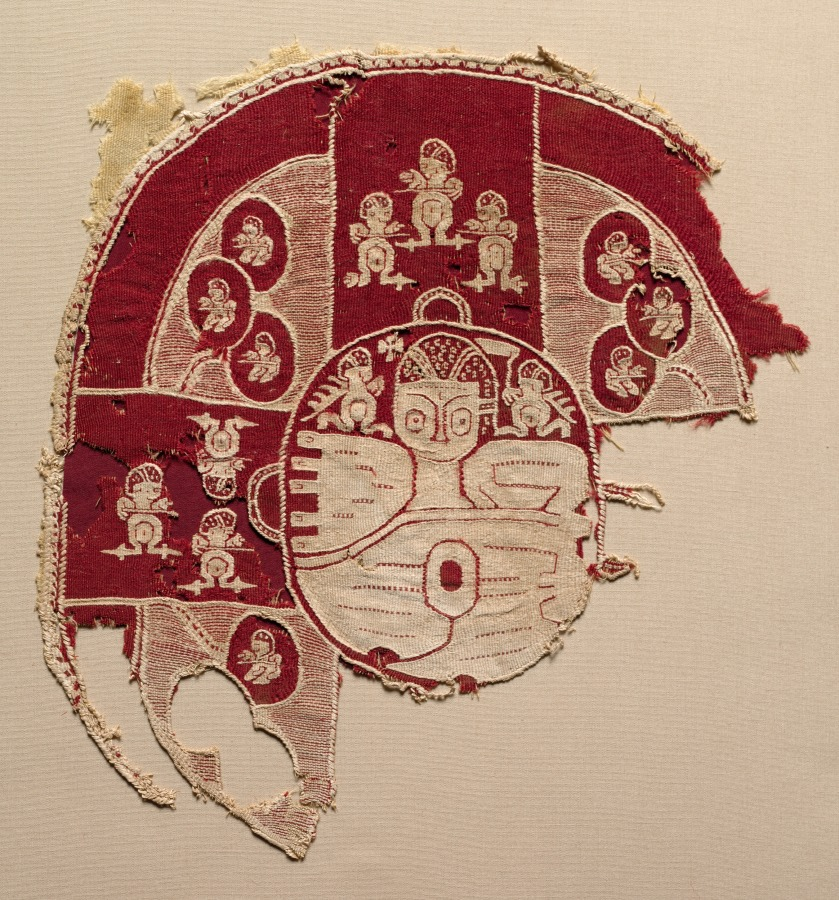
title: Tunic or Shawl Ornament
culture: Egypt, Byzantine period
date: 600s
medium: dyed wool, undyed linen; plain weave, slit-tapestry weave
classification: Textile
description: This oval originally belonged to a matched set that would have decorated either a unisex tunic or shawl. The fragment features a distinctive semi-abstract style of figural representation.